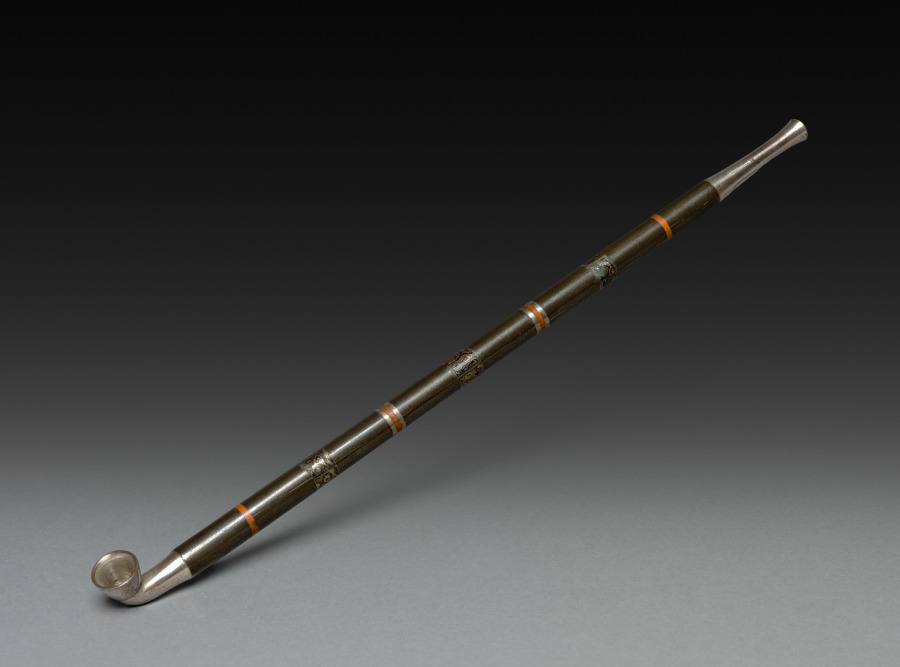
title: Tobacco Pipe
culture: Japan, Edo period (1615–1868)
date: 1700s to mid-1800s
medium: metals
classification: Miscellaneous